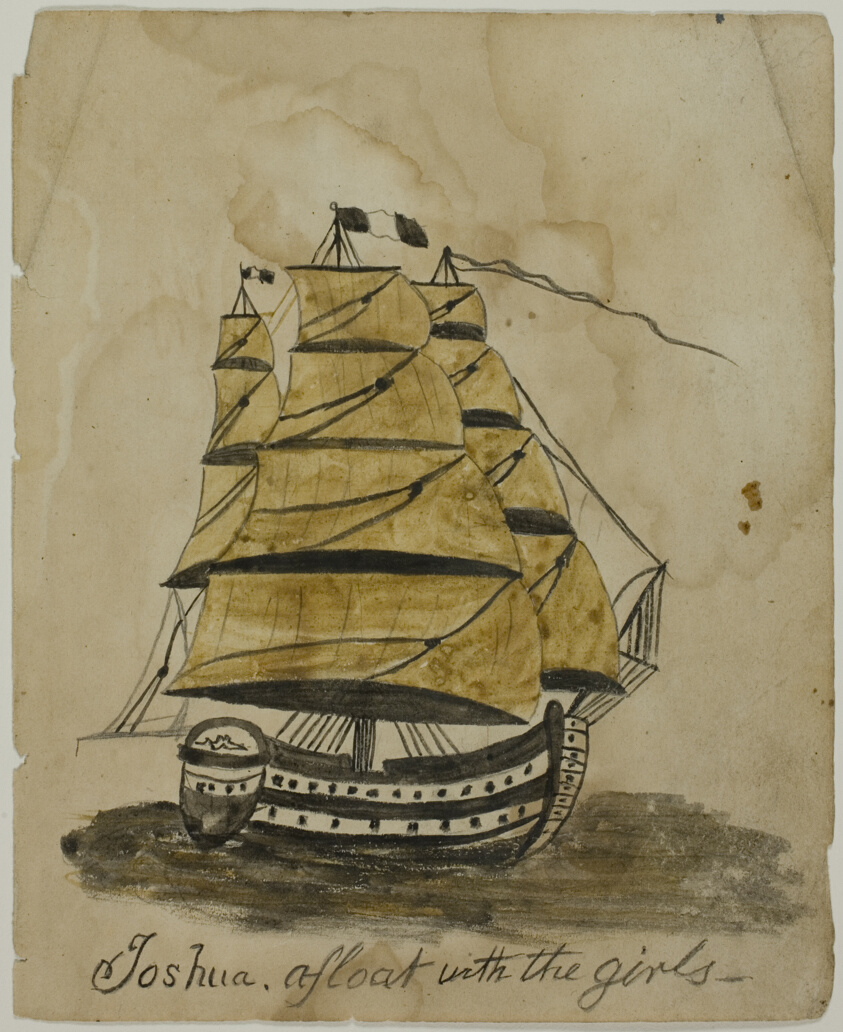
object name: Drawing and Watercolor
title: Joshua Afloat with the Girls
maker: Unknown Artist; American, 19th century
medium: Watercolor over graphite on cream wove paper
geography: United States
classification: watercolor; drawings (visual works); prints and drawing